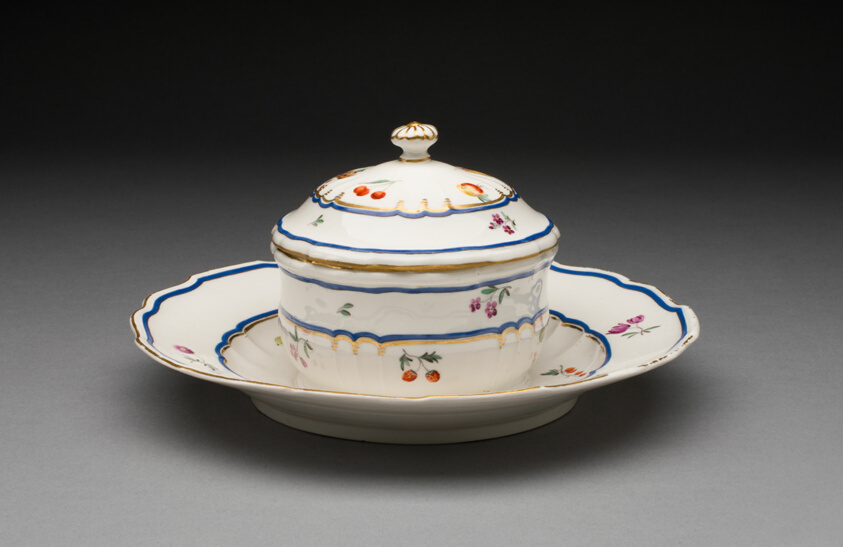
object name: Ceramics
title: Covered Dish with Attached Stand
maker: Frankenthal Porcelain Factory; German, founded 1755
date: c. 1775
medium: Hard-paste porcelain with polychrome enamels and gilding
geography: Frankenthal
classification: dish (vessel); tableware; porcelain; european decorative arts; ceramics